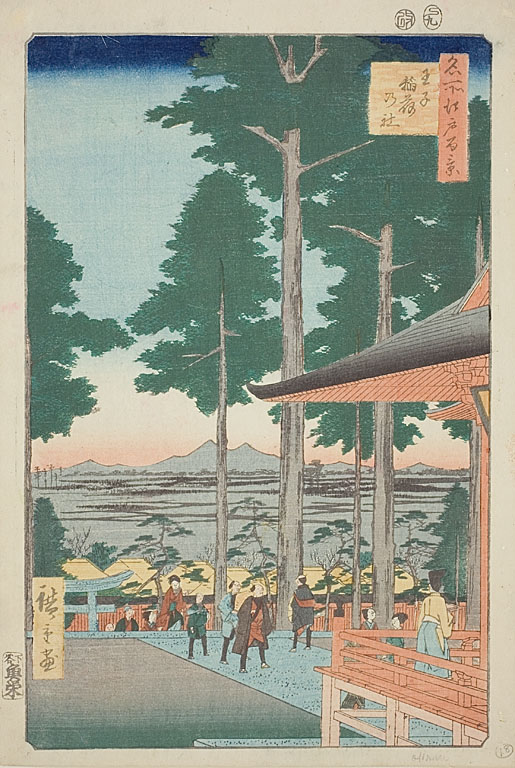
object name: Print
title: Oji Inari Shrine (Oji Inari no yashiro), No.18 from the series "One Hundred Famous Views of Edo (Meisho Edo hyakkei)"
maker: Utagawa Hiroshige (Japanese, 1797-1858)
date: 1857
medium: Color woodblock print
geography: Japan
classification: woodblock print; print; asian art